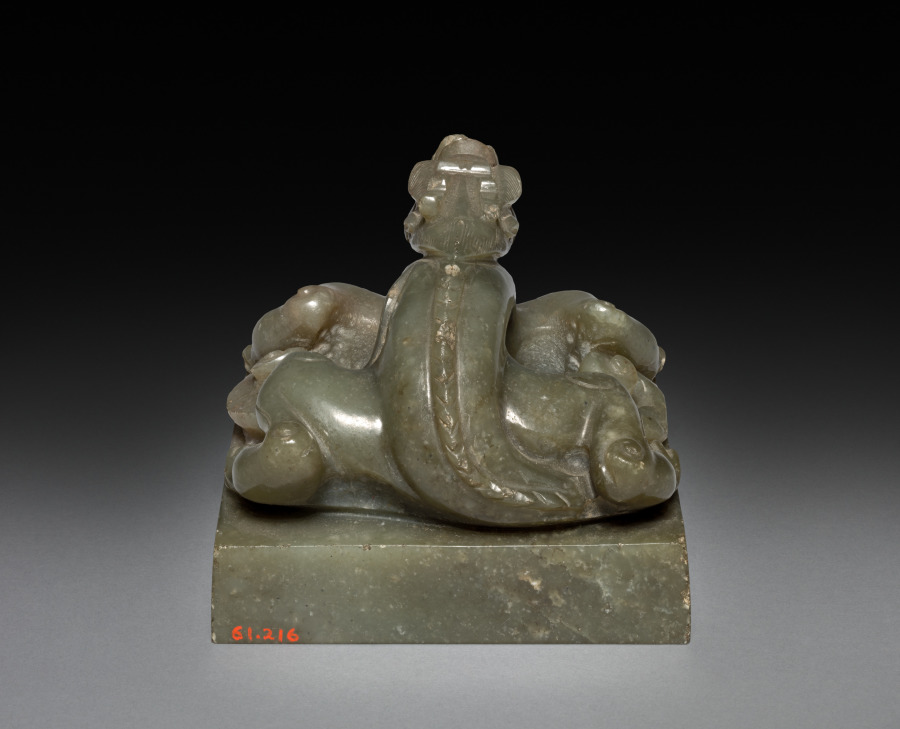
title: Seal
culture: China, Qing dynasty (1644-1911)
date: 1700 or later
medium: Jade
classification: Jade